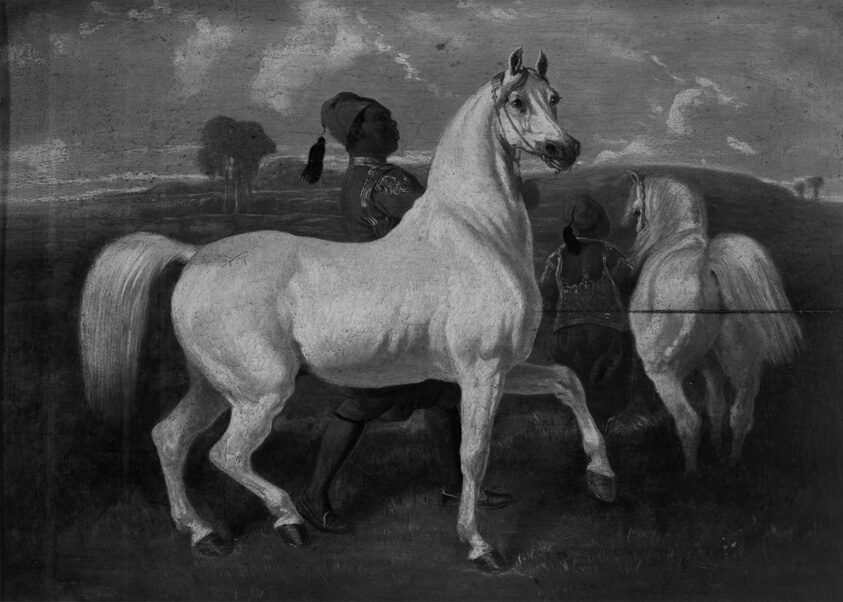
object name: Painting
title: Giafar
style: nineteenth century, 19th century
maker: Attributed to Alfred Dedreux (French, 1810–1860)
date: 1850s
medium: Oil on panel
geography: France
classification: oil on panel; france; french; oil paintings (visual works); paint; painting; european painting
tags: horse, French, France, African, clouds, trees, man, men, animals, landscape, horses